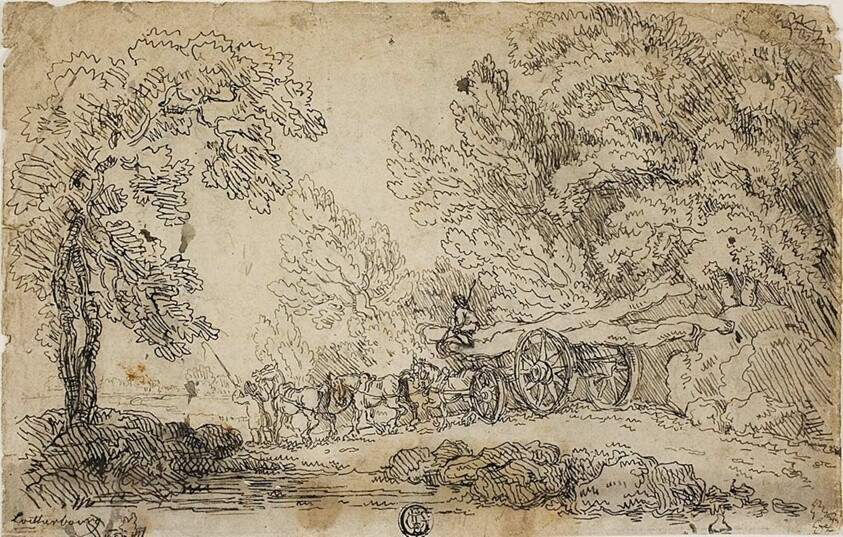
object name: Drawing and Watercolor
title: Hauling Logs in a Forest (recto); Sketches of People in Various Activities (verso)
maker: Philip Jacques de Loutherbourg; French, 1740-1812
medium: Pen and black ink, with touches of brush and gray wash, on tan wove paper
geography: France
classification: pen and ink drawings; drawings (visual works); prints and drawing